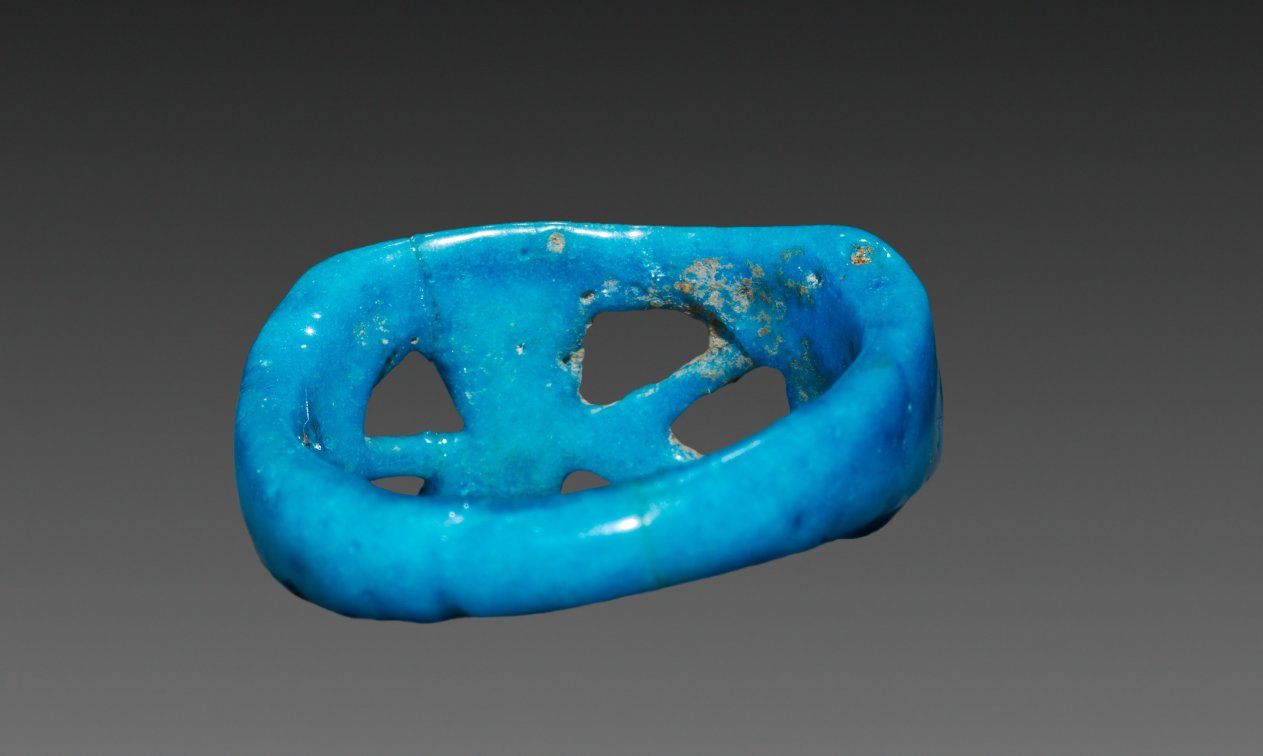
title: Wedjat-Eye Ring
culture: Egypt, New Kingdom (1540–1069 BCE), Dynasty 18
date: 1350–1296 BCE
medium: bright turquoise blue faience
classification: Jewelry